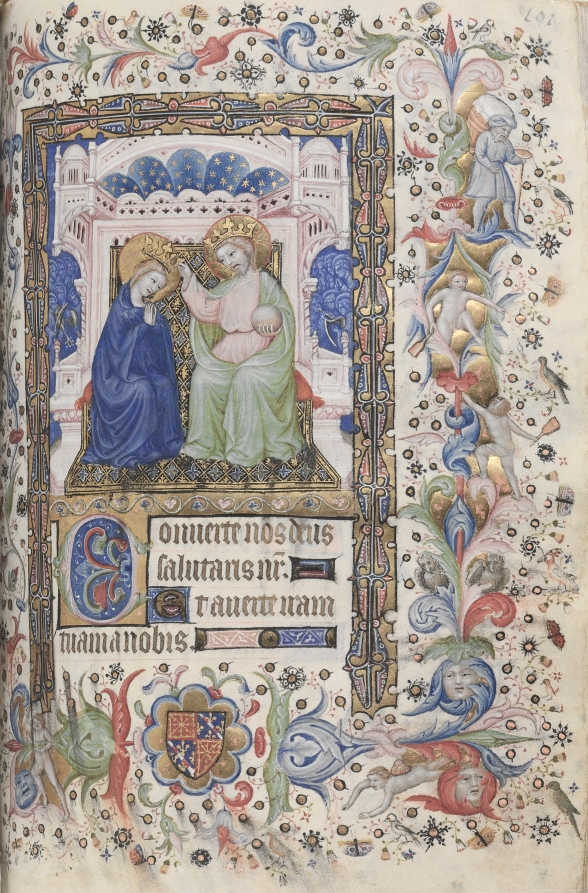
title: Hours of Charles the Noble, King of Navarre (1361-1425): fol. 96r, Coronation of the Virgin (Compline)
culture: France, Paris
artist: Master of the Brussels Initials and Associates (French)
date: c. 1405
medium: ink, tempera, and gold on vellum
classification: Bound Volume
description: This precious volume was obviously highly prized by its owner, the French-born King of Navarre, who had his coat of arms painted on no less than twenty folios. Rather than directly commissioning this manuscript from a specific workshop, it seems that Charles the Noble acquired his book of hours -- perhaps ready-made for the luxury market -- while on a trip to Paris in 1404-05. A collaborative effort, six painting styles are evidenced within the pages of this codex, those of two Italians, two Frenchmen, and two Netherlanders. The painter who was responsible for the planning and decoration of the book, and who produced seventeen of the large miniatures, was a Bolognese artist known as the Master of the Brussels Initials. His principal assistant, responsible for most of the borders, was a Florentine who signed his name "Zecho" da Firenze on folio 208 verso.